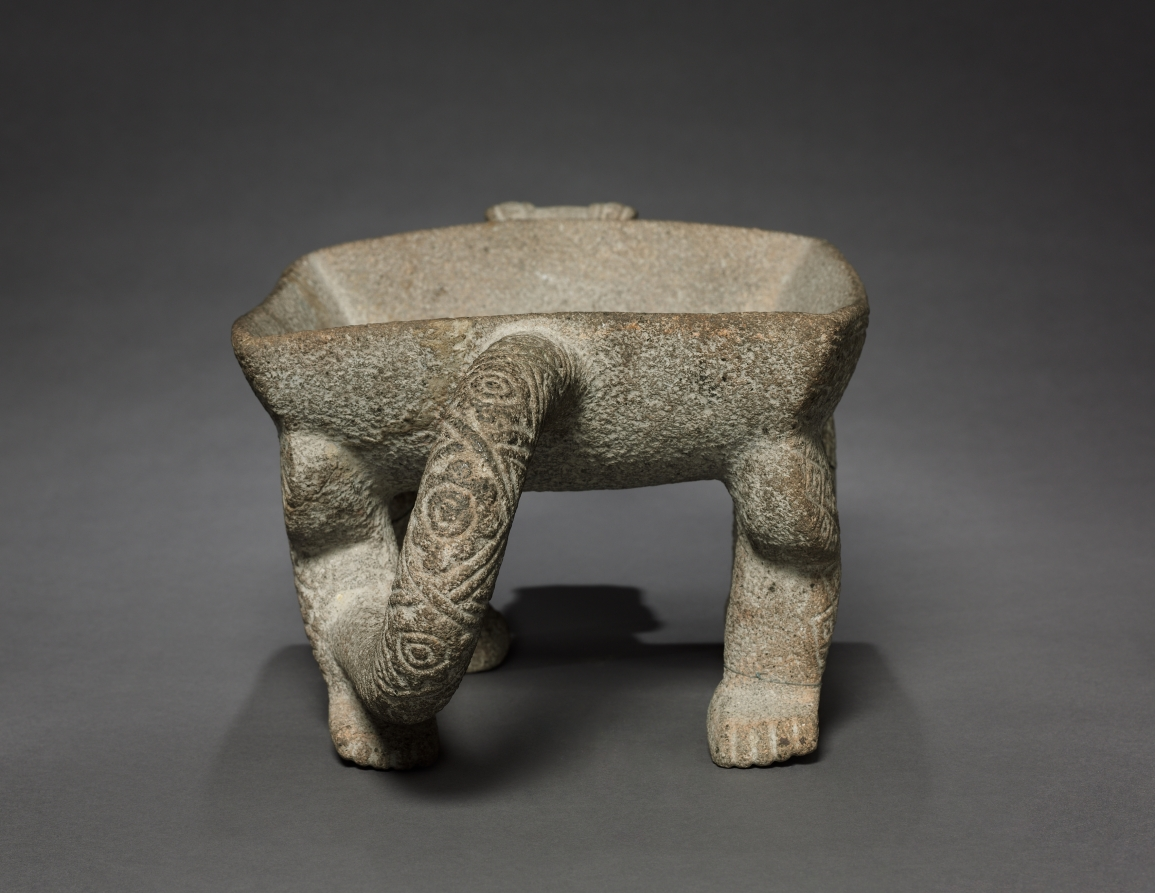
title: Jaguar Grinding Stone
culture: Costa Rica, Atlantic Watershed region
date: c. 1000–1550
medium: stone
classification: Sculpture